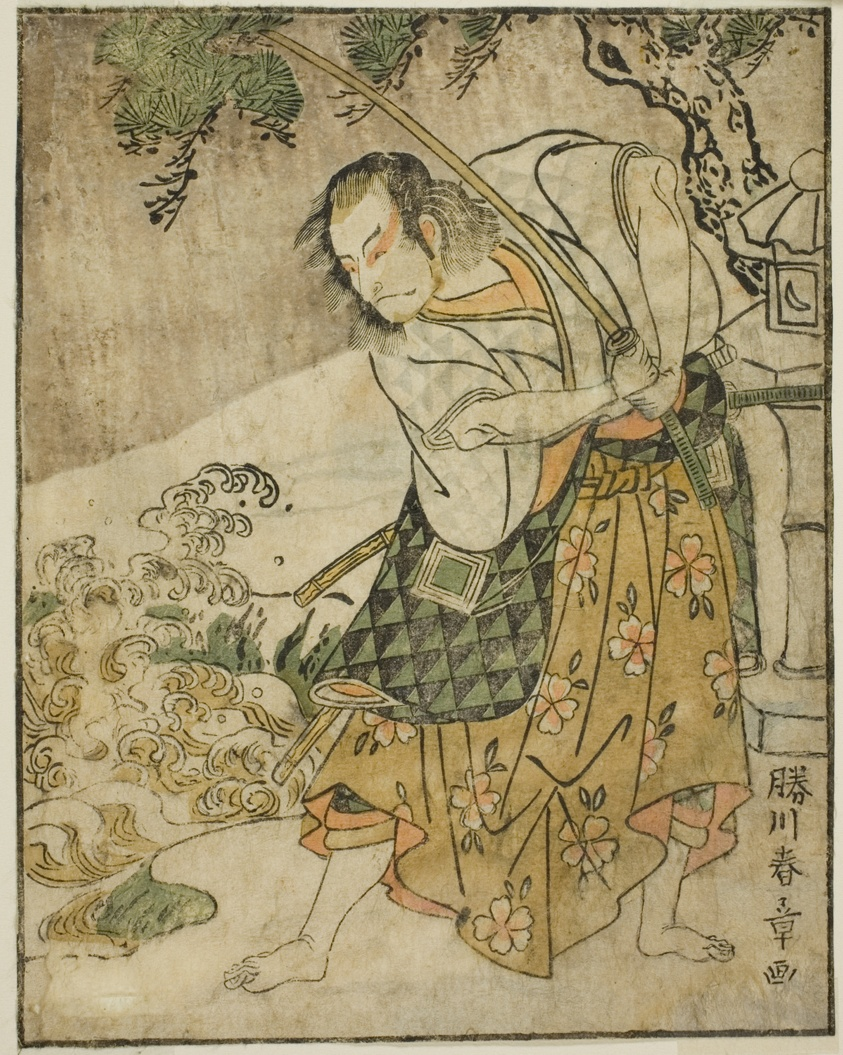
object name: Print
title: The Actor Ichikawa Danjuro V as Ogata no Sabura (?) in the Play Nue no Mori Ichiyo no Mato, Performed at the Nakamura Theater in the Eleventh Month, 1770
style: Japanese (culture or style)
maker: Katsukawa Shunsho 勝川 春章; Japanese, 1726-1792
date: c. 1772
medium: Color woodblock print; from the illustrated book Yakusha Kuni no Hana (Prominent Actors of Japan)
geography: Japan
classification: woodblock print; print; asian art